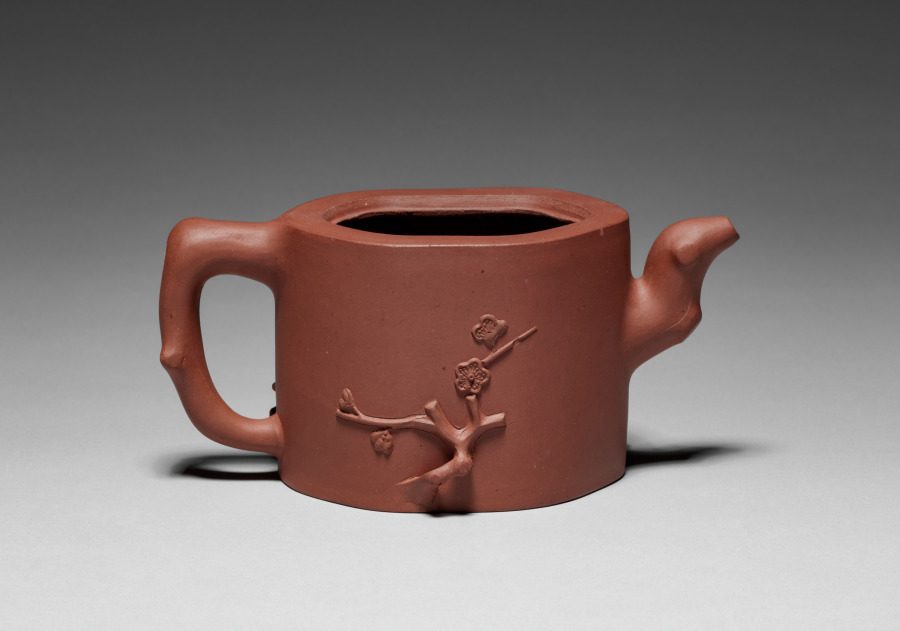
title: Yixing Teapot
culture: China, Qing dynasty (1644-1911)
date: 1800s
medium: stoneware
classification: Ceramic